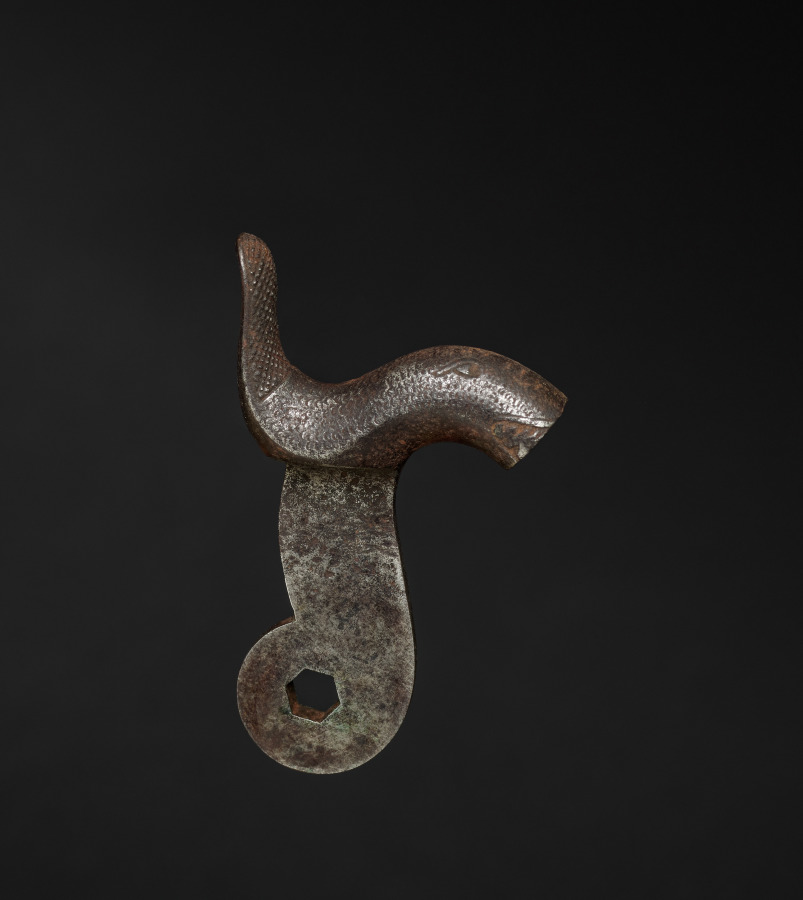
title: Gun-Lock Hammer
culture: England, early 19th century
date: c. 1800–1825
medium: steel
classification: Arms and Armor